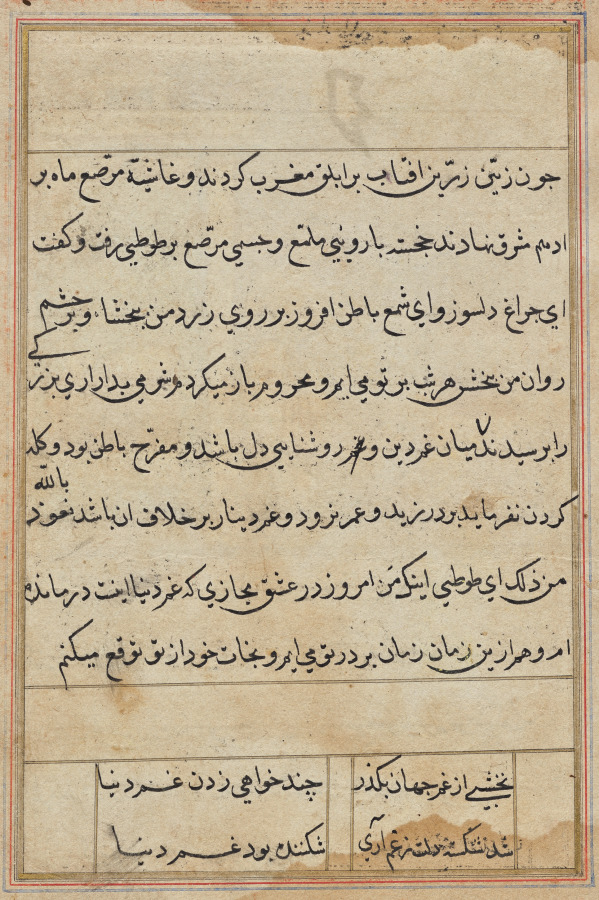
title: Page from Tales of a Parrot (Tuti-nama): text page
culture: Mughal India, court of Akbar (reigned 1556–1605)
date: c. 1560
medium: gum tempera, ink, and gold on paper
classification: Painting